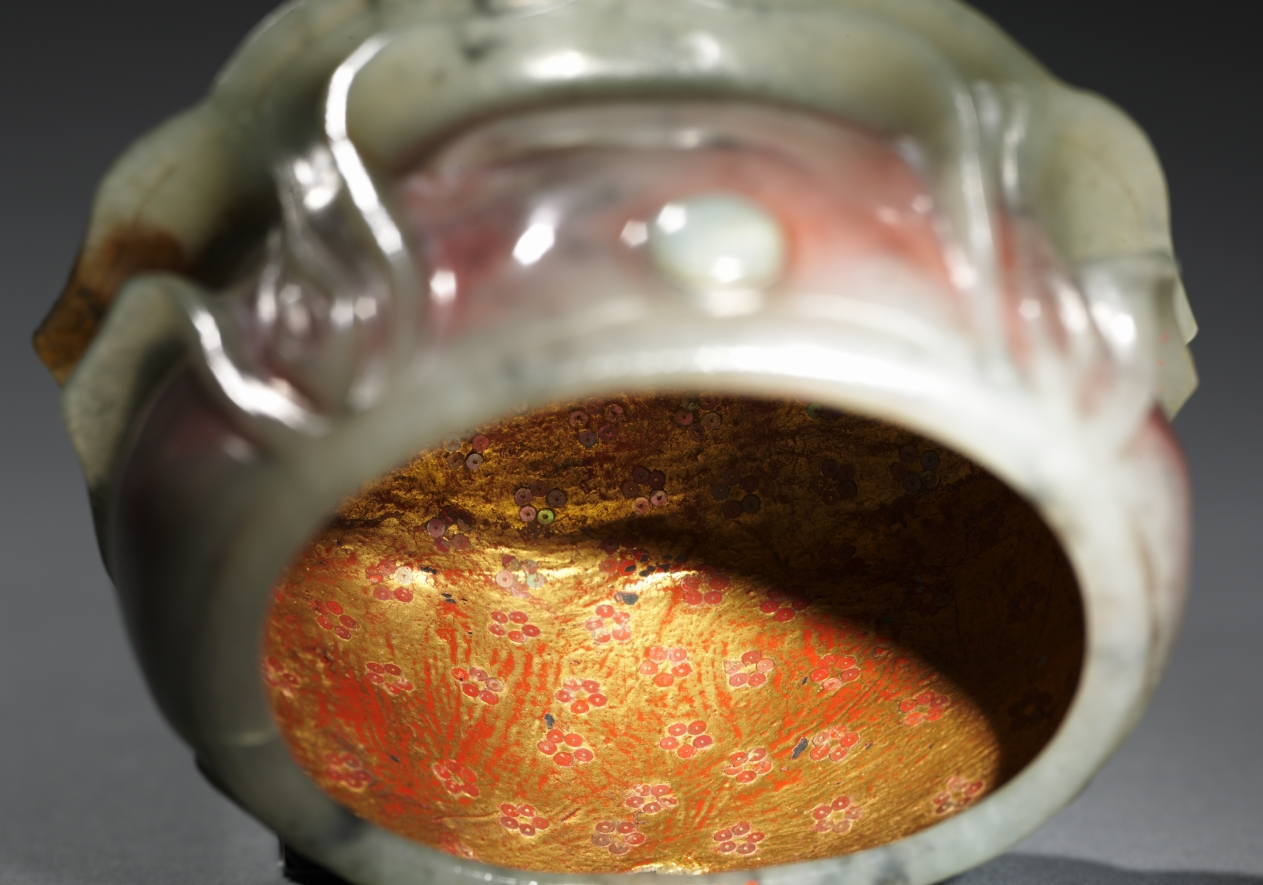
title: Daoist Cap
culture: China, Song dynasty (960-1279) - Yuan dynasty (1271-1368)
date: 960–1279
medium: grayish-green jade with brown and black markings; interior with pink pigment and gold inlays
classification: Jade